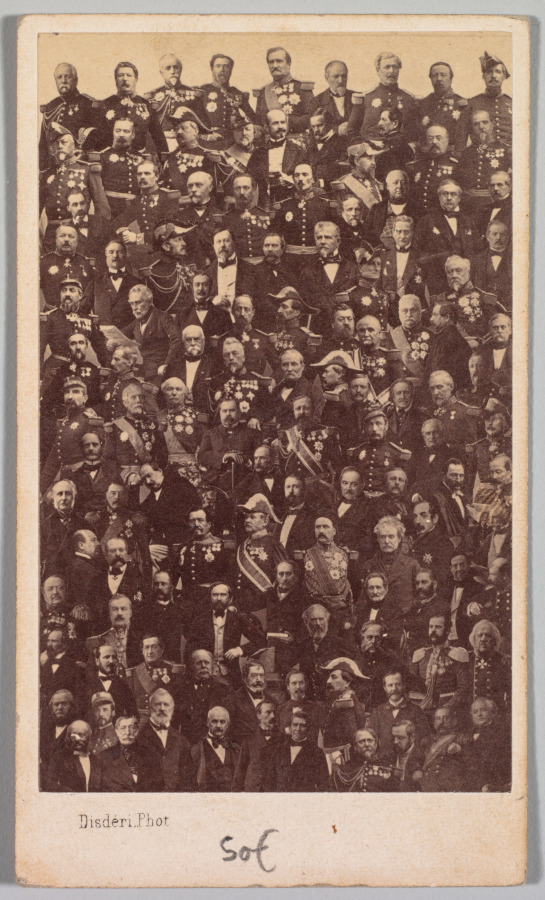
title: Untitled (French Military Heroes and Political Leaders)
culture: France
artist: André Adolphe-Eugène Disdéri (French, 1819–1889)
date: mid-1860s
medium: albumen print, montage carte-de-visite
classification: Photograph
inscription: Imprinted in black ink on recto: “Disdéri. Phot” Written in pencil on recto: “50 Euros” Imprinted in black ink on verso: “DISDERI/PHOTOGRAPHE de S.M. L’EMPEREUR/8, Boulevart des Italiens/PARIS”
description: This montage of France’s military and other leaders is a mosaic carte, a form invented by Disdéri, produced by cutting photographs of hundreds of figures away from their backgrounds, mounting the likenesses on a single sheet, photographing that collage, and printing the result on 6 x 9 cm cards. These entertaining images sold well and were effective advertising for the photographer’s prowess.